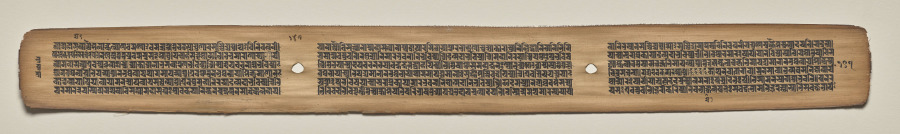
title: Text, Folio 147 (verso), from a Manuscript of the Perfection of Wisdom in Eight Thousand Lines (Ashtasahasrika Prajnaparamita-sutra)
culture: Eastern India, Bihar, Vikramashila Monastery. Painting: Nepal, Kathmandu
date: Sunday, September 14, 1119 (year 239 of the Newar Samvat in the month of Ashvina)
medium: gum tempera and ink on palm leaves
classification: Painting